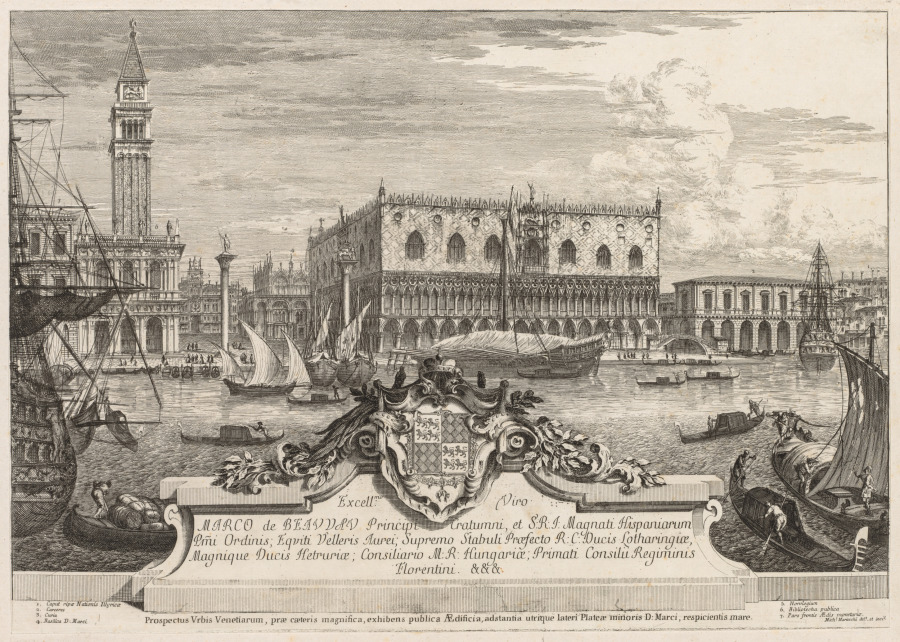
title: Views of Venice: The Piazzetta and Ducal Palace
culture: Italy, 18th century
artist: Michele Marieschi (Italian, 1710–1743)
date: 1741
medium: etching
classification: Print